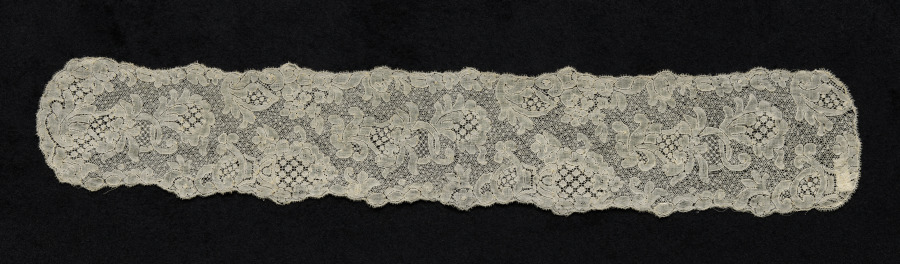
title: Lace Lappet (one of a pair)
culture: Belgium, Mechelen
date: 1700s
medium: Linen: bobbin lace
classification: Lace